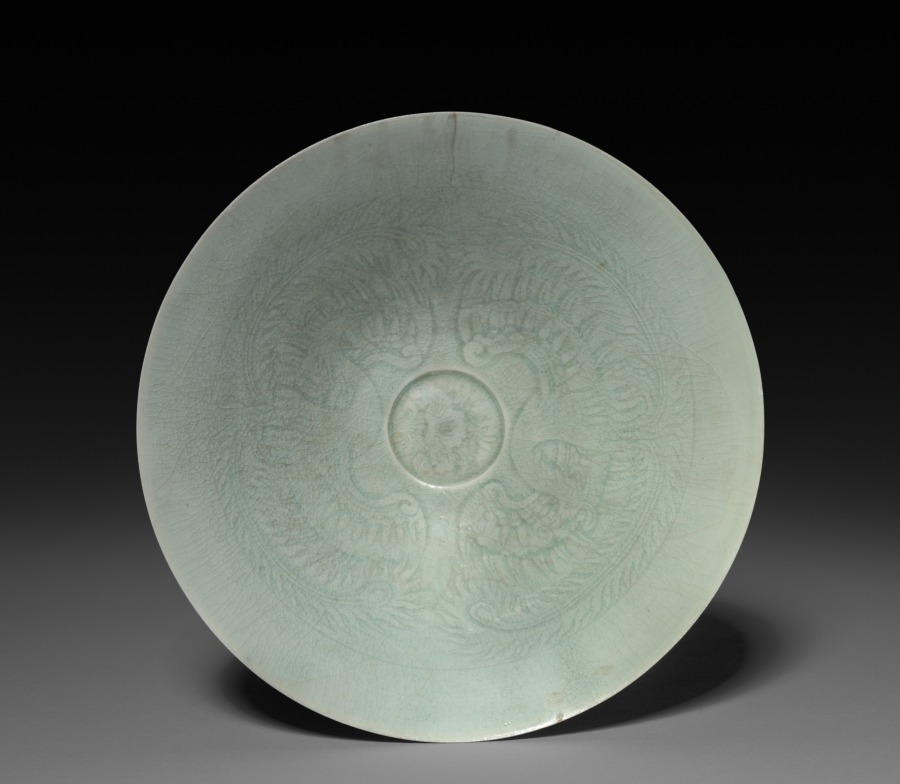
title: Coniform Bowl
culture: China, Song dynasty (960-1279)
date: 960–1279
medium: White porcelain, Yingqing ware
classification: Ceramic